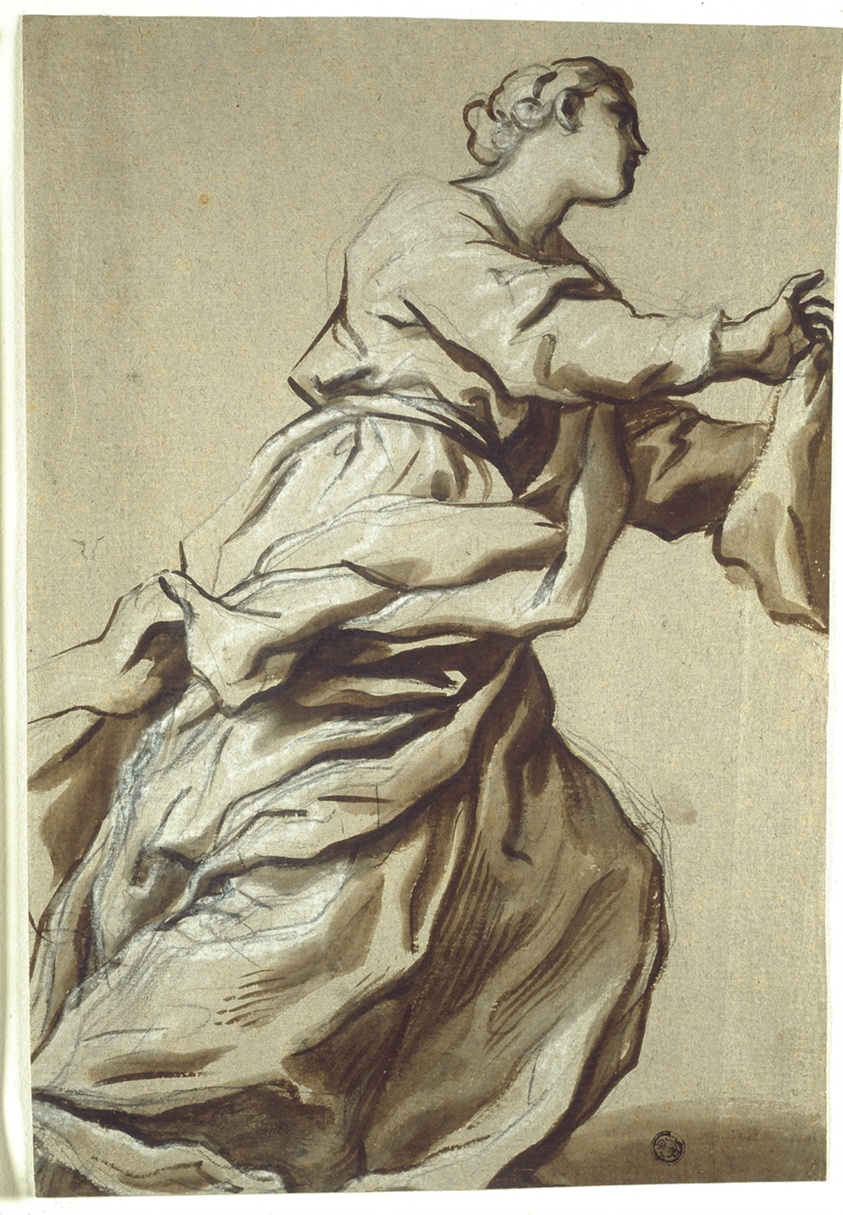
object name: Drawing and Watercolor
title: Study for Detail: Saint Veronica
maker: Attributed to Domenico Piola; Italian, 1627-1703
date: c. 1680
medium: Brush and brown ink, heightened with white chalk, over black chalk, on gray laid paper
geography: Italy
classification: ink or chalk wash; drawings (visual works); prints and drawing